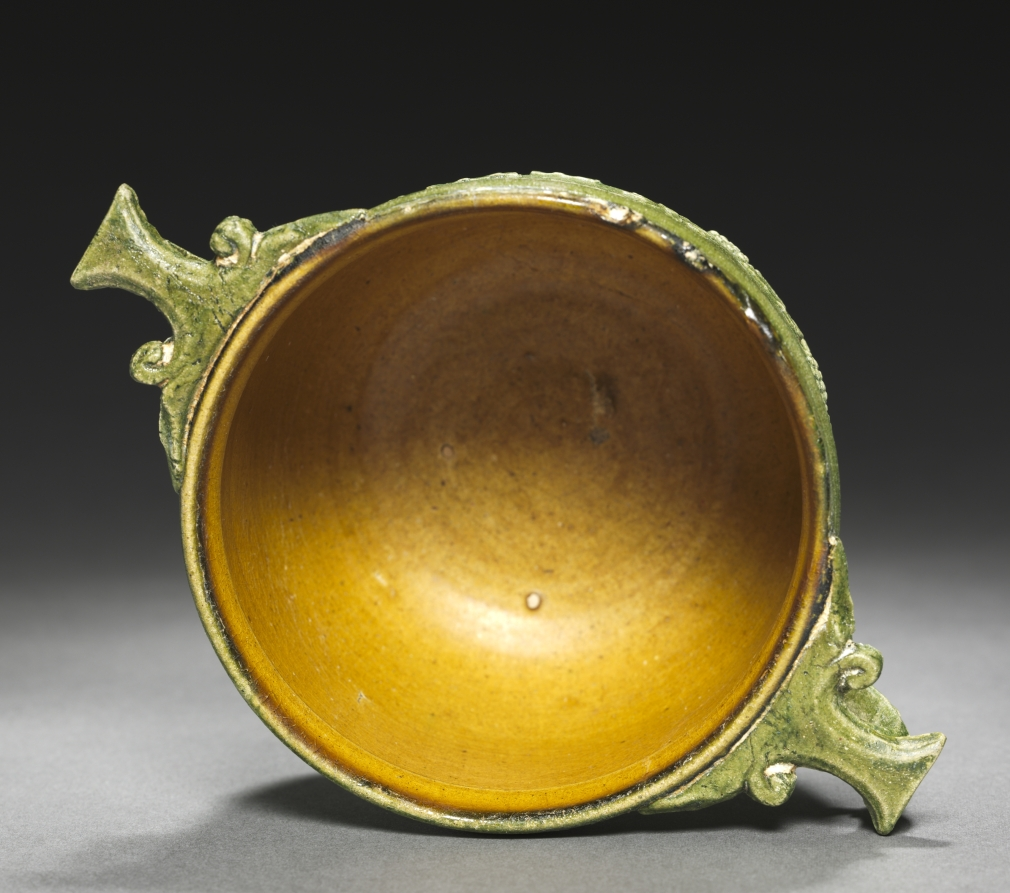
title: Skyphos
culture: probably Turkey, Roman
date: 1–100 CE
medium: earthenware with slip decoration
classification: Ceramic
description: Lead glaze was first used near the Mediterranean basin around 1000 bc, appearing in Mesopotamia and Egypt almost simultaneously. The technique flourished during the Roman Empire, and examples can be found in all reaches of the realm from England and Germany to North Africa, Syria, and Turkey, and perhaps even further east. This is a very fine example of this technique.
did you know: Lead glaze is what gives this wine cup its yellowish-green color.